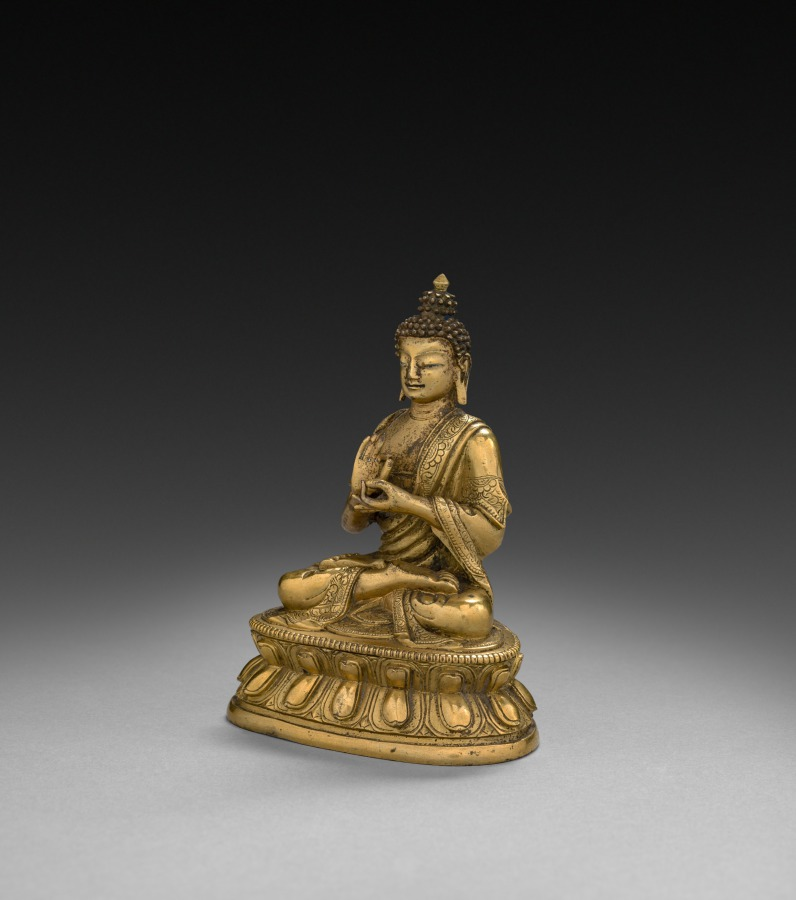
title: Seated Buddha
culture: China, Ming dynasty (1368–1644)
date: 1500s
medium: gilt bronze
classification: Sculpture